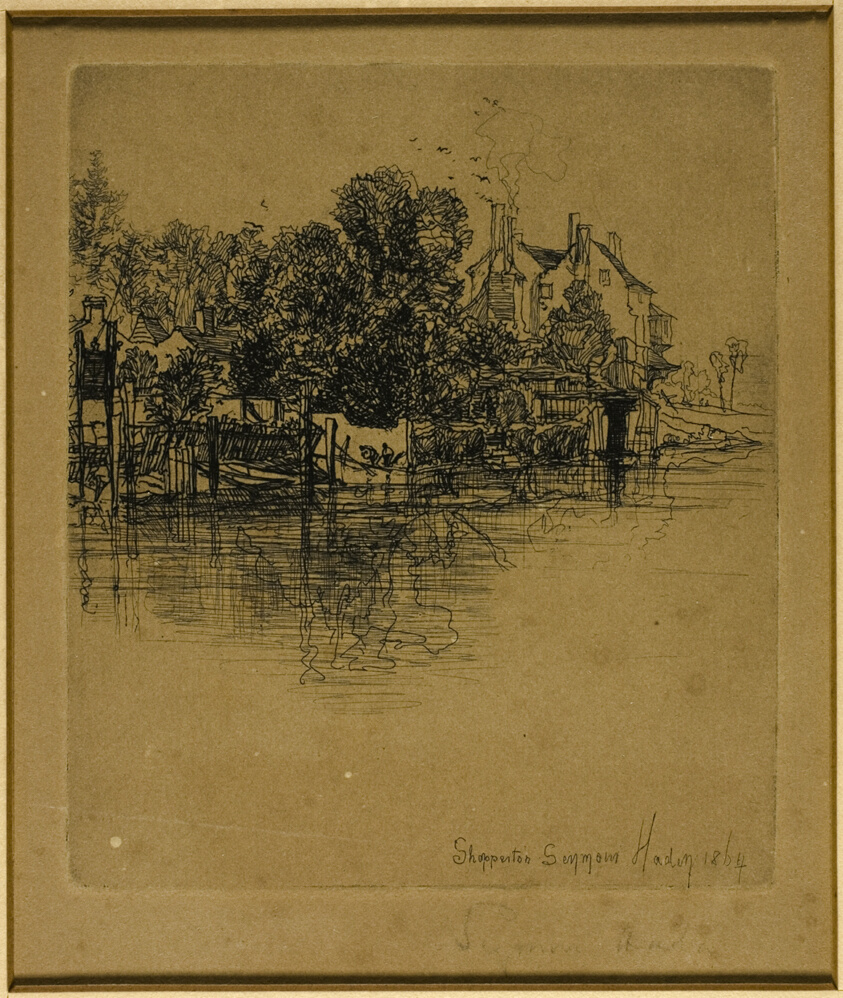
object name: Print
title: Shepperton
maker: Francis Seymour Haden (English, 1818-1910)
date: 1864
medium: Etching on wove paper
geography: England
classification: etching; print; prints and drawing